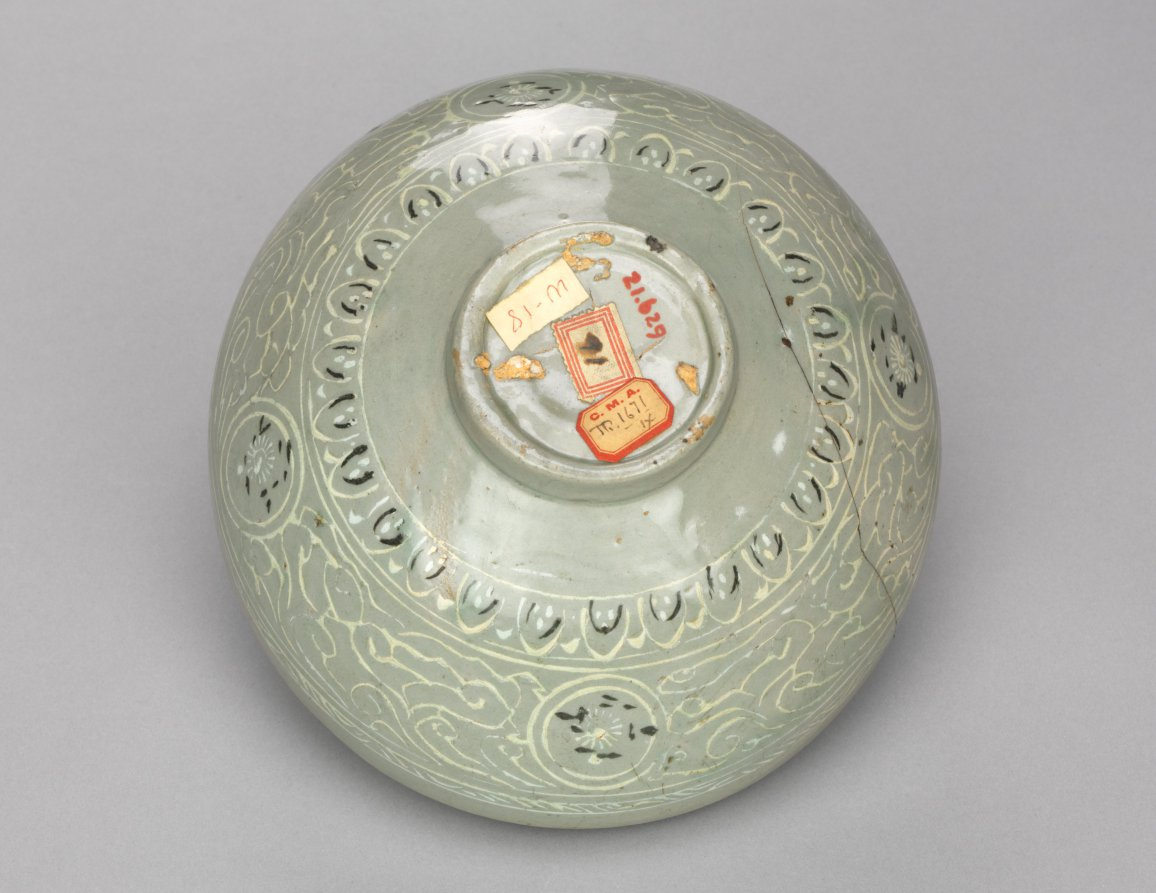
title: Bowl with Inlaid Cranes and Clouds Design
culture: Korea, Goryeo dynasty (918–1392)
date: 1200s-1300s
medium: pottery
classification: Ceramic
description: As early as the seventh century, the practice of drinking tea and wine became an important part of elite leisure culture in Korea. A wide bowl like this example was especially suitable for drinking powdered tea shaved from a compressed tea cake, the most commonly enjoyed type during the Goryeo period. The image of flying cranes amid clouds that decorate the inner wall of this tea bowl is considered an auspicious sign particularly about the king's good governance.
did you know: An actual event in 1121, which constitutes a groups of cranes hovering above the palace in Kaifeng, the capital of the Chinese Northern Song dynasty, soon became internationally recognized as a heavenly sign about the ruler's virtuous governance.